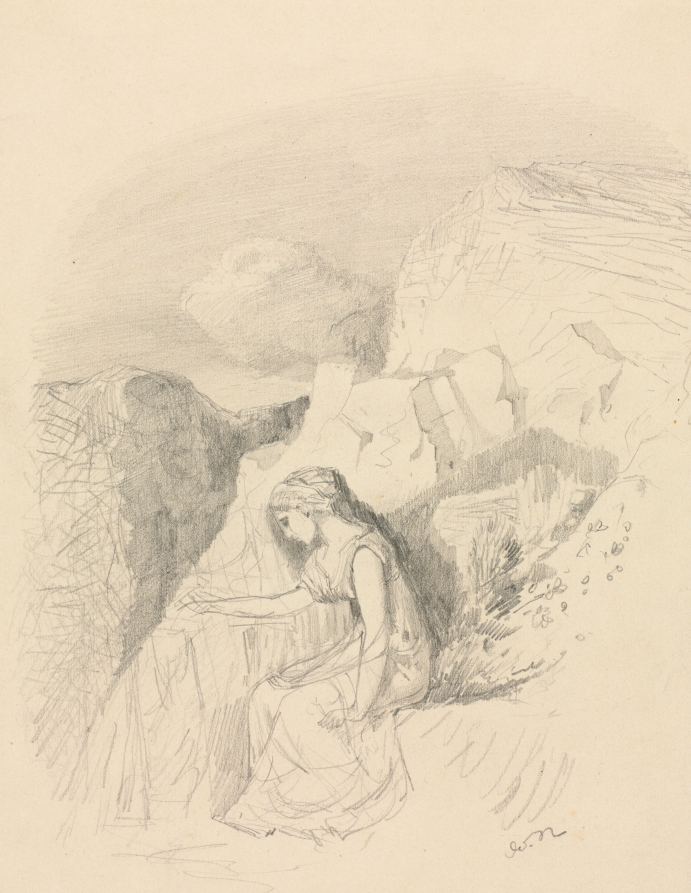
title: Melancholy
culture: France, 19th century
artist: Odilon Redon (French, 1840–1916)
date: c. 1868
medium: graphite on beige wove paper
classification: Drawing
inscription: signed, lower right, in graphite: Od.R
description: Odilon Redon grew up near the massive Pyrénées mountains in southern France and their image recurred throughout his work. In a series of drawings made during the 1870s, Redon used the craggy surface and infinite reach of his native landscape to evoke a sense of solitude and isolation. The woman seen here, for example, leans forward and casts her eyes downward as if in resignation.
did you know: Redon incorporated fantastical details into his mountainous landscape, including a small creature seen faintly directly above the woman and a profile that vaguely appears in the shadows next to her.